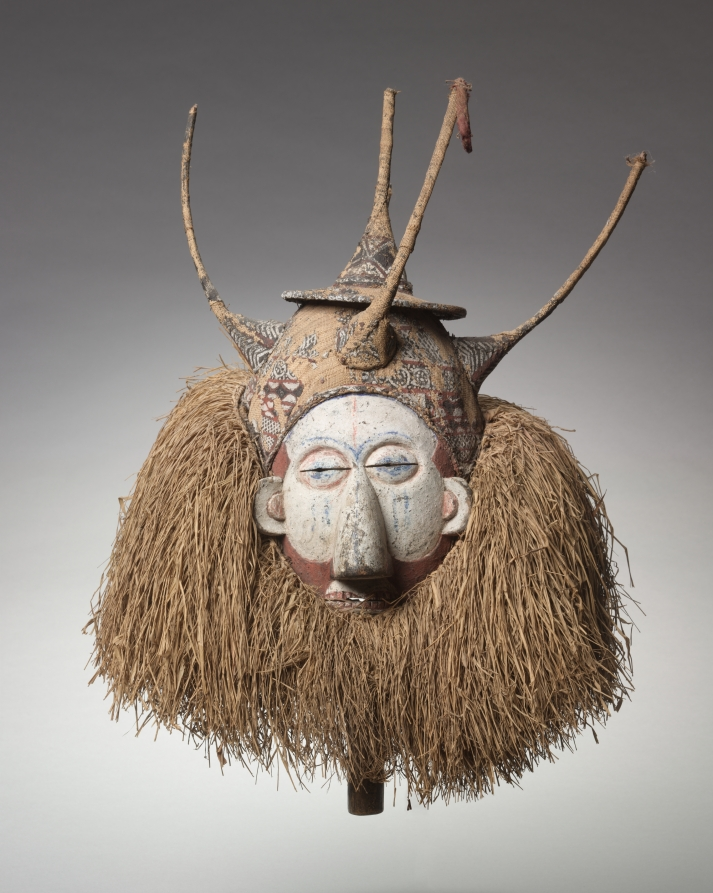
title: Mask (ndeemba)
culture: Africa, Central Africa, Democratic Republic of Congo, Yaka-style carver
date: early 1900s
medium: Wood, raffia, paint, and cotton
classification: Mask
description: This Mask (Ndeemba) has been featured prominently in the African galleries since making its debut at the Cleveland Museum of Art in 1962. Dated to the 1900s, the object is part of a group of eight masks that appear at the end of the circumcision and puberty ritual (n-khanda) for Yaka boys. It would have marked the new status of the boys who became men and commemorated their re-entry into the village. Affirming age-long tradition, such masks are worn by the master of the initiation or by the newly initiated himself.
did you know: Look under the fluffy layers of raffia fiber to see the handle; this mask was "worn" by holding it up to the face.